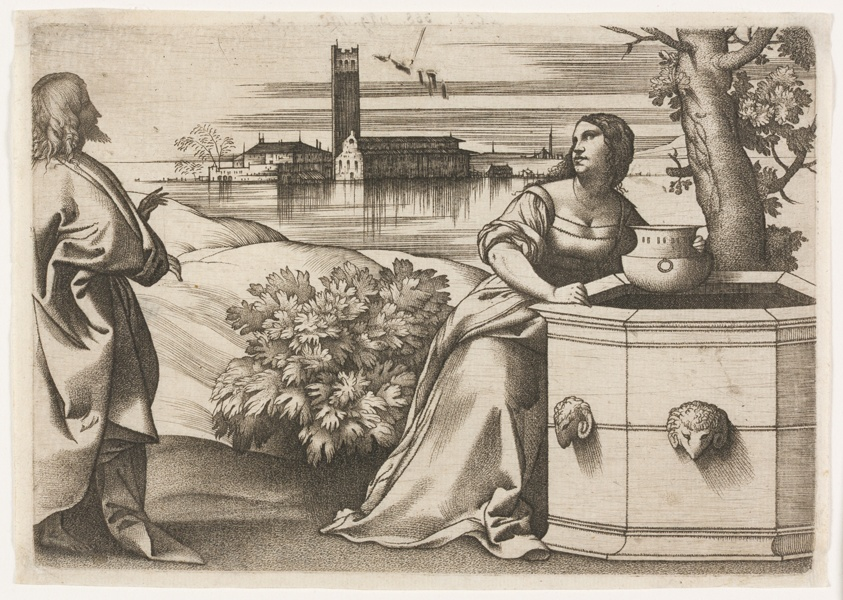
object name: Print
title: Christ and the Samaritan Woman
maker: Giulio Campagnola (Italian, c. 1482-1515/18)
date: c. 1510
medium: Engraving in black on ivory laid paper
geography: Italy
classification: engraving; print; prints and drawing